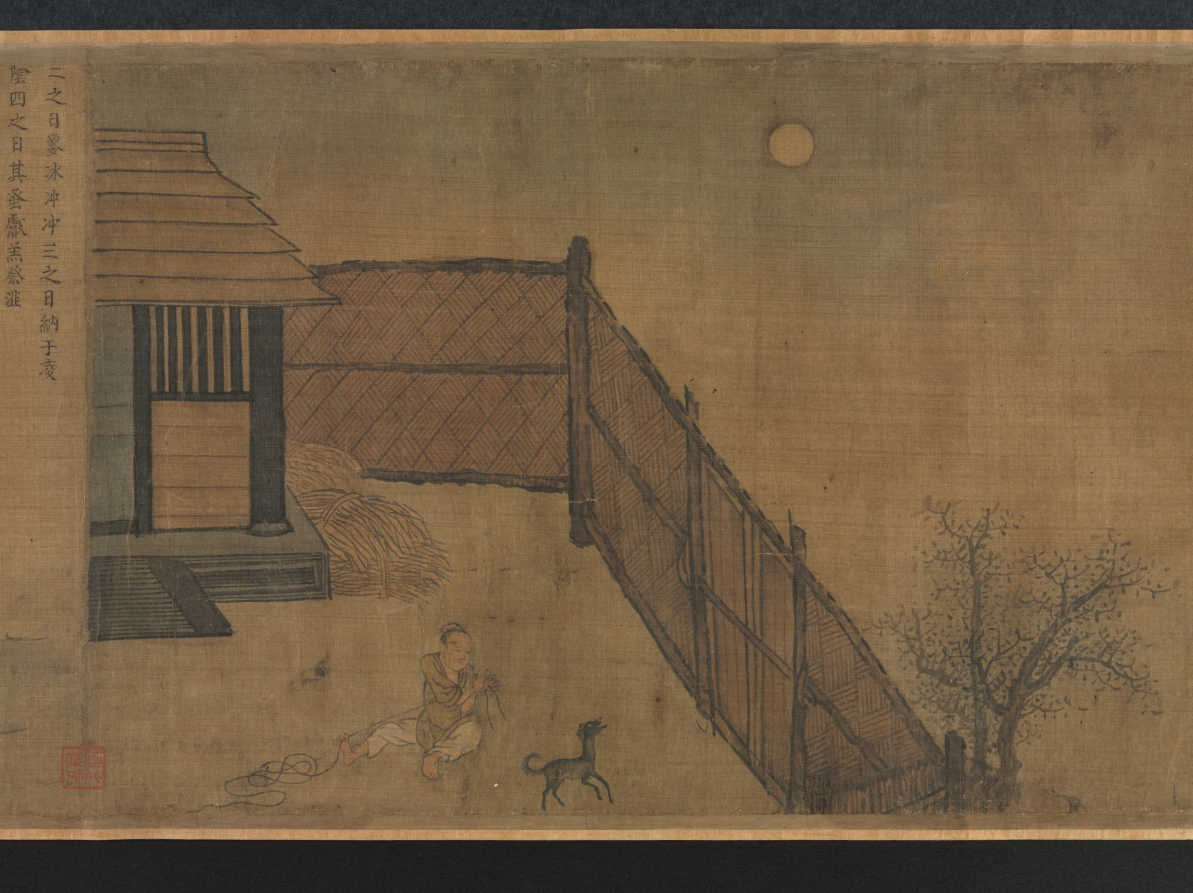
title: "Seventh Month" from the Odes of Bin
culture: China, Southern Song dynasty (1127-1279)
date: 1200s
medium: Handscroll; ink and color on silk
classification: Painting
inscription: Colophons: 1. [on the frontispiece] by the Qianlong emperor (dated 1741). 2. by Lu Wan (dated Zhengde dingchou, 1517). 2. by the Jiaqing emperor (dated 1807).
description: According to Confucian thought, the ruler looks after the well-being of his people which involves agricultural activities. Seventh Month from the ancient Odes of Bin in the Shijing (Book of Poetry) describes occupations throughout the year, including plowing, harvesting, hunting, making clothes, and observing rituals. The earliest illustrations of these Odes accompanied by text were commissioned by Southern Song emperor Gaozong (reigned 1127–1162). As the lower Yangzi delta had become the new seat of government, Gaozong had sets of these illustrations produced by court artists to revive the dynasty and convince the Confucian officialelite of his legitimacy to rule.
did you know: The Odes of Bin appears in the classic Shijing (Book of Poetry), an anthology of more than 300 poems, folk songs, and ceremonial hymns that were originally chanted to music.